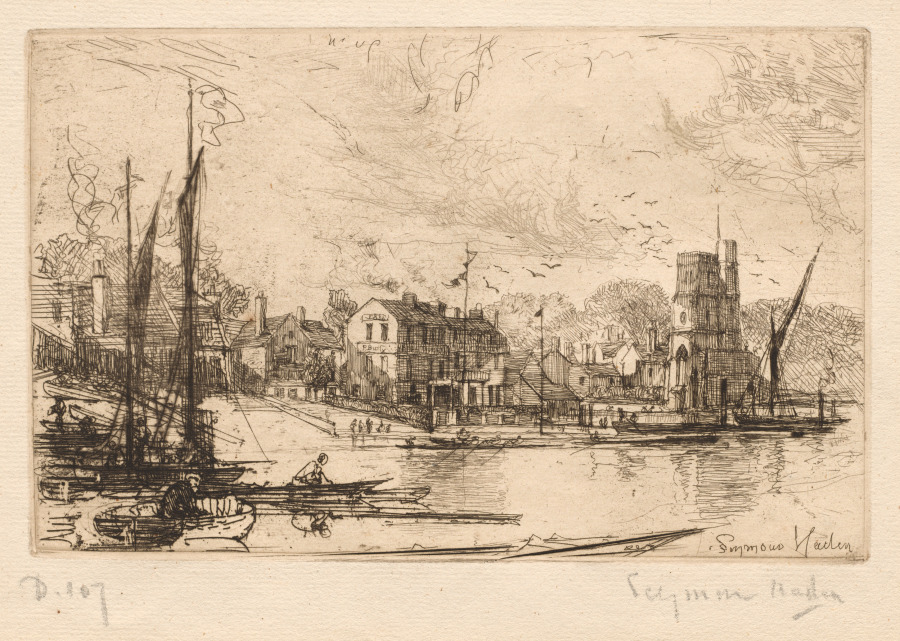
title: Harry Kelly's, Putney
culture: England, 19th century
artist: Francis Seymour Haden (British, 1818–1910)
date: 1865–1866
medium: etching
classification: Print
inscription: signed lower right in pencil: Seymour Haden signed lower right in plate: Seymour Haden Lower left, in graphite: D. 107 D.; lower right, in grapihte: Seymour Haden